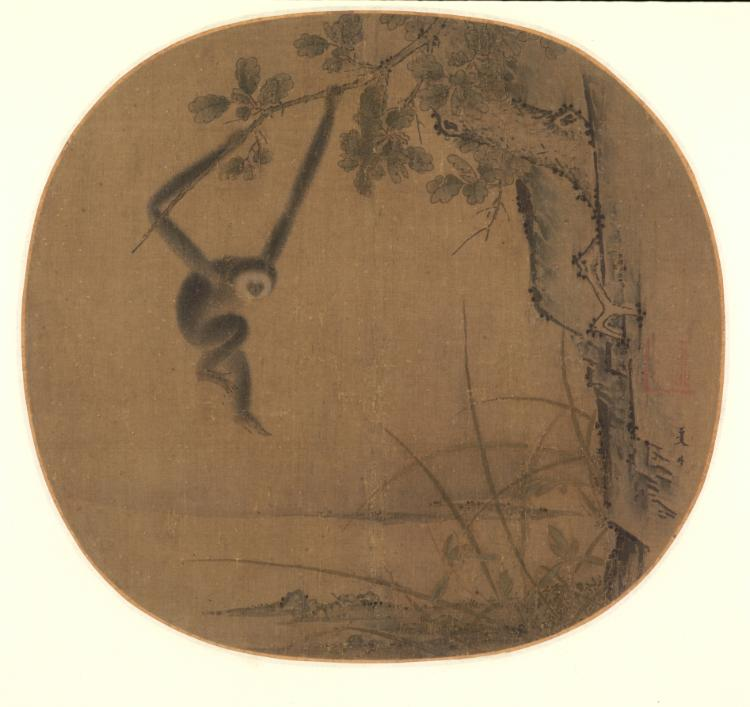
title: Swinging Gibbon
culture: China, Southern Song dynasty (1127-1279)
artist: attributed to Xia Gui (Chinese, active c. 1209–c. 1243)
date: late 1100s–early 1200s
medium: Album leaf; ink and color on silk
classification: Painting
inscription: Artist's signature: Hsia ? .